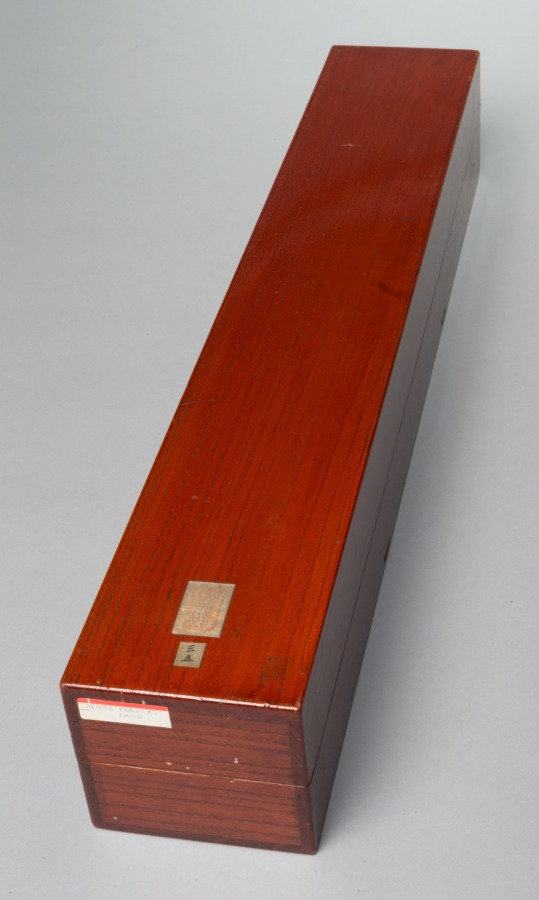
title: Monju as a Child (Chigo Monju)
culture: Japan, Muromachi period (1392–1573)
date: early 1400s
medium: hanging scroll; ink, color, and gold on silk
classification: Painting